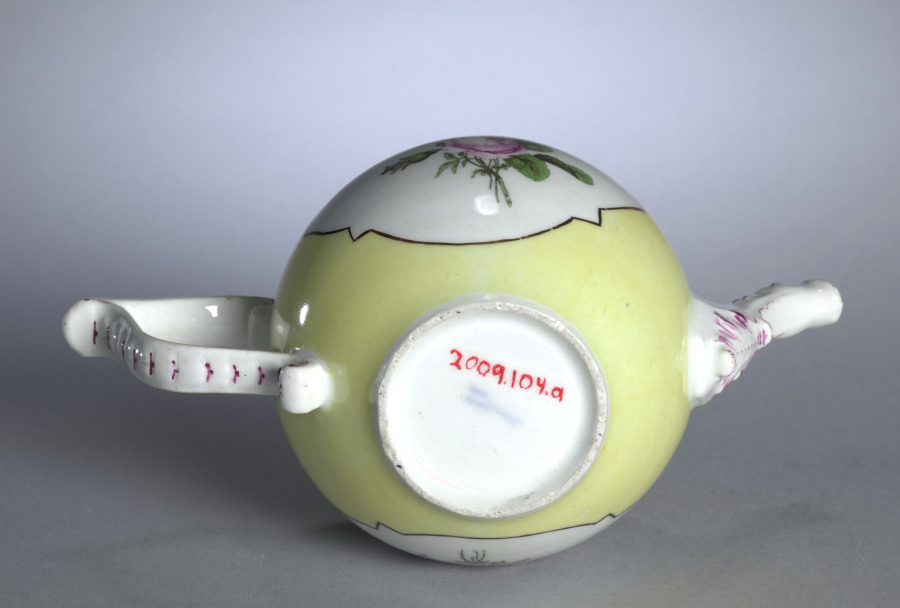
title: Teapot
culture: Germany, Meissen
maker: Meissen Porcelain Factory (German, est. c. 1710)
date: c. 1750–70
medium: porcelain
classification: Ceramic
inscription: Mark on the bottom that looks like two swords crossing, with a small V intersecting.